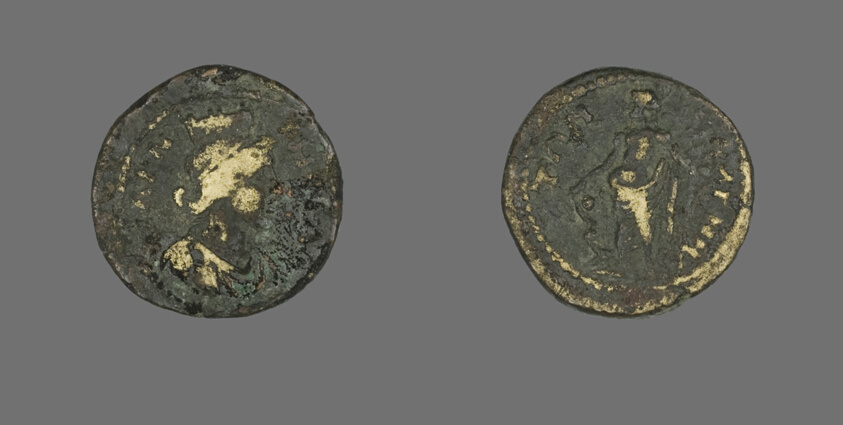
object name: Coin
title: Coin Depicting the Goddess Tyche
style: roman (ancient, style or period), ancient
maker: Roman; probably minted in Magnesia ad Sipylum, Lydia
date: 238-244 (?)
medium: Bronze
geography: Roman Empire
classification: coin; ancient art